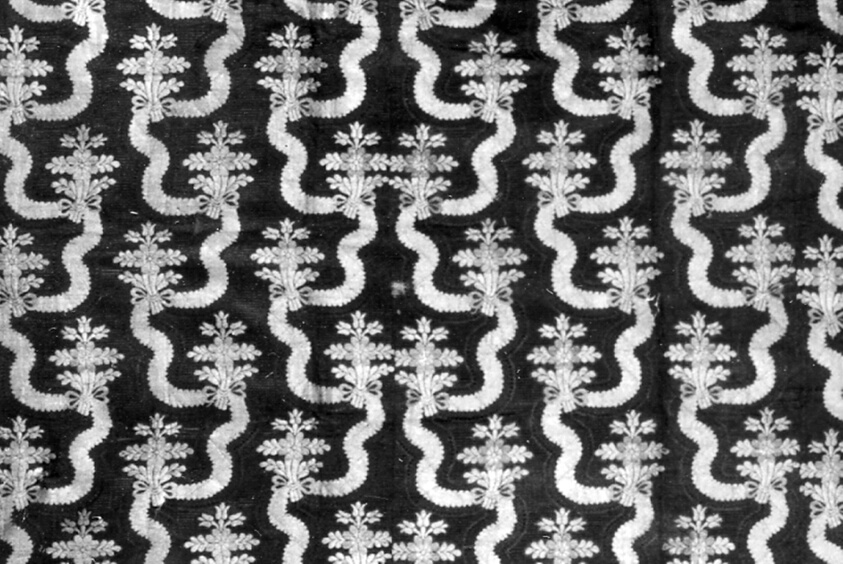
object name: Textile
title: Panel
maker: Posssibly Russia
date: 19th century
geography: Russia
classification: textile; weaving